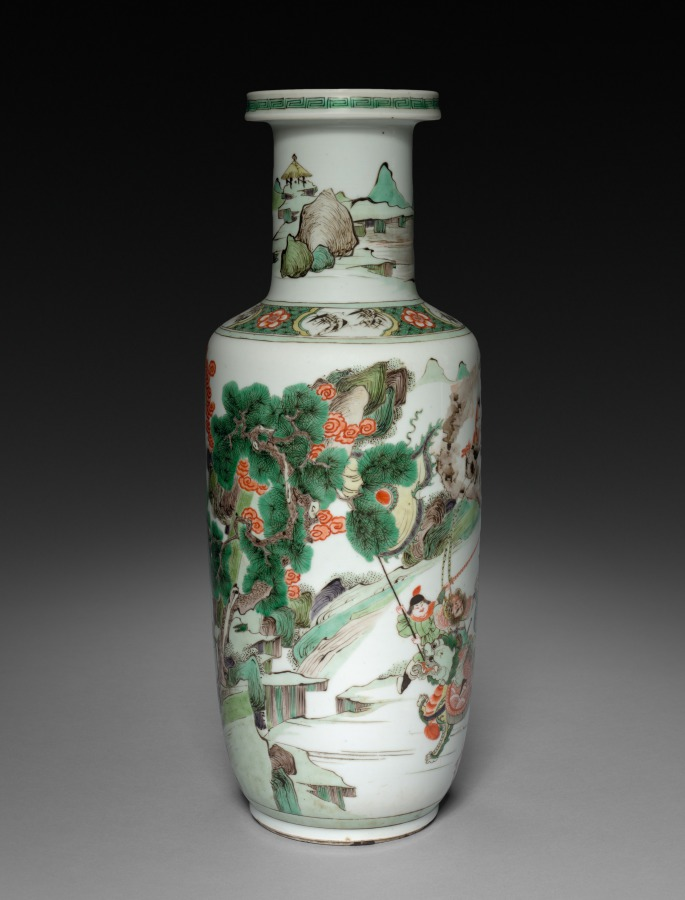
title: Vase with Decoration of Horsemen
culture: China, Qing dynasty (1644-1911), Kangxi reign (1662-1722)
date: 1622–1722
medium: porcelain with famille verte overglaze enamel decoration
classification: Ceramic